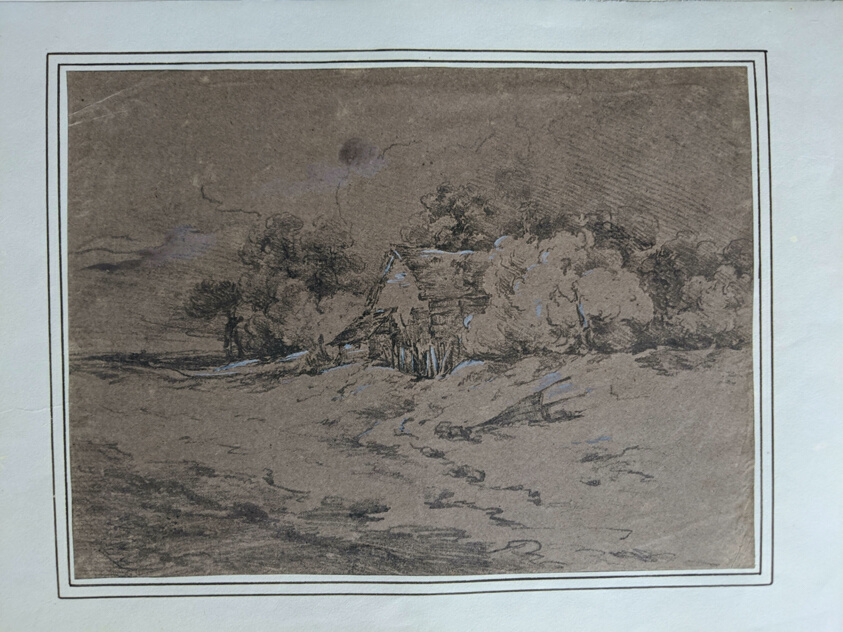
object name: Print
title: Studies of Landscapes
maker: François-Thomas-Louis Francia (French, 1772–1839); after various English artists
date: 1810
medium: 46 soft ground etchings in black, some heightened with wash, on ivory, blue, and buff wove papers, mounted onto 39 sheets of cream wove paper, ruled with pen and brown ink (with 5 unrelated prints)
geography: France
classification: prints and drawing; paper; print; etching